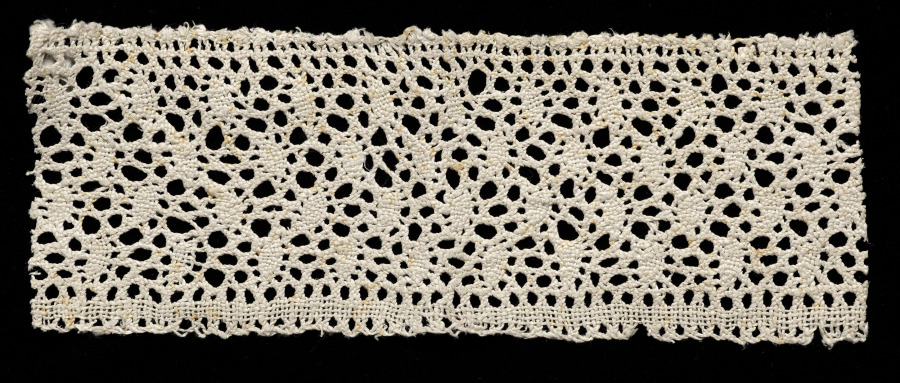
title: Lace Insertion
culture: Italy, Umbria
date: 1600s–1700s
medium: Bobbin lace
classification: Lace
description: The design motif of this piece of bobbin lace is called "piedi di gallina" (chicken's feet).